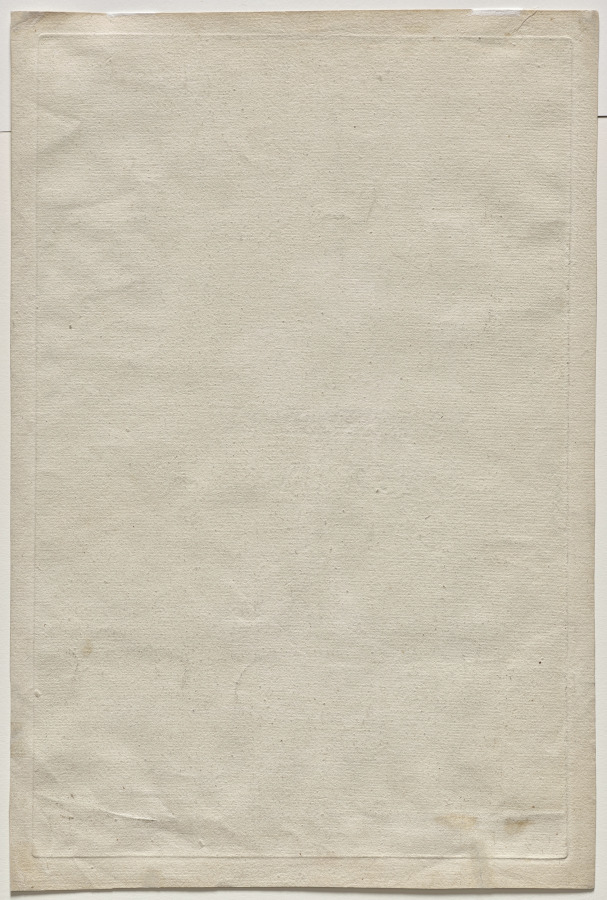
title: St. Francis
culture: France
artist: Claude Mellan (French, 1598–1688)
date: 1638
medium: engraving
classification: Print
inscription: WATERMARK: letters (indisctinct)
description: The French engraver Claude Mellan spent time in Rome, where he developed a unique engraving style that uses simplified linear patterns and swelled lines to create optical, almost abstract effects. He made this image St. Francis, one of several featuring saints in the wilderness, just after he returned to Paris. The engraver’s inventive patterns of lines cross at small angles, creating moiré effects, so that the surface seems to shimmer.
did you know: Notice how the engraver portrayed the cloak of St. Francis with patches of parallel, swelled lines placed at different angles.